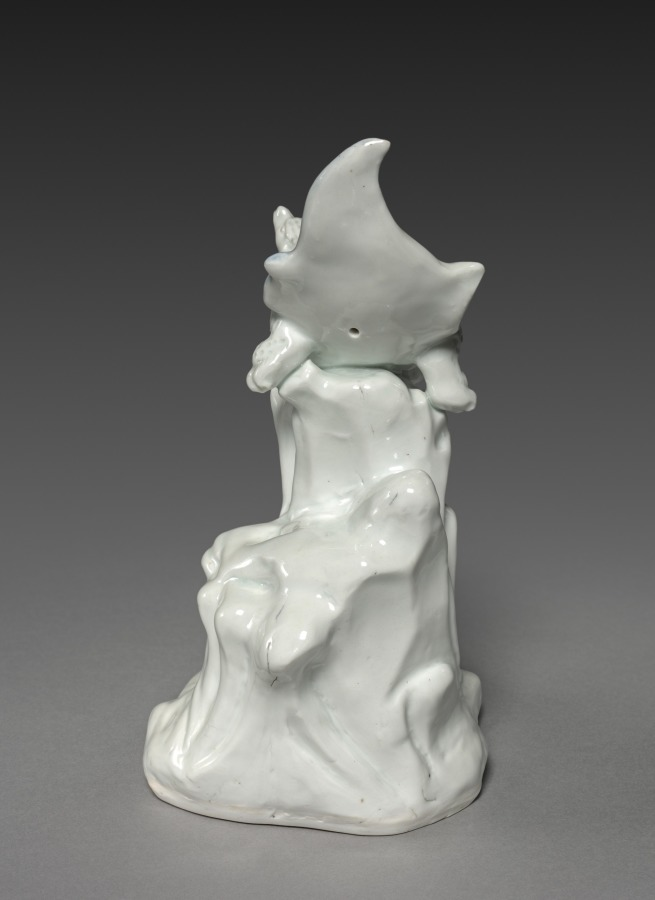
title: Tortoises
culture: Japan, Edo period (1615–1868)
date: early to mid-1800s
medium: porcelain, molded and carved, with underglaze blue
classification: Ceramic